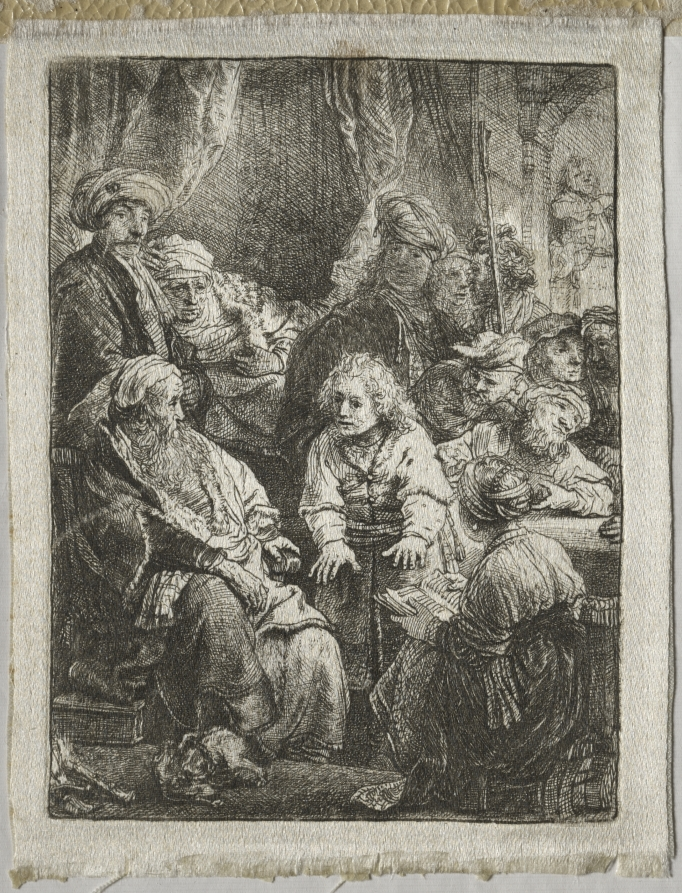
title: Joseph Telling his Dreams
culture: Netherlands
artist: Rembrandt van Rijn (Dutch, 1606–1669)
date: 1638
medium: etching with drypoint on silk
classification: Print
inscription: lower left, in plate: Rembrandt f. 1638